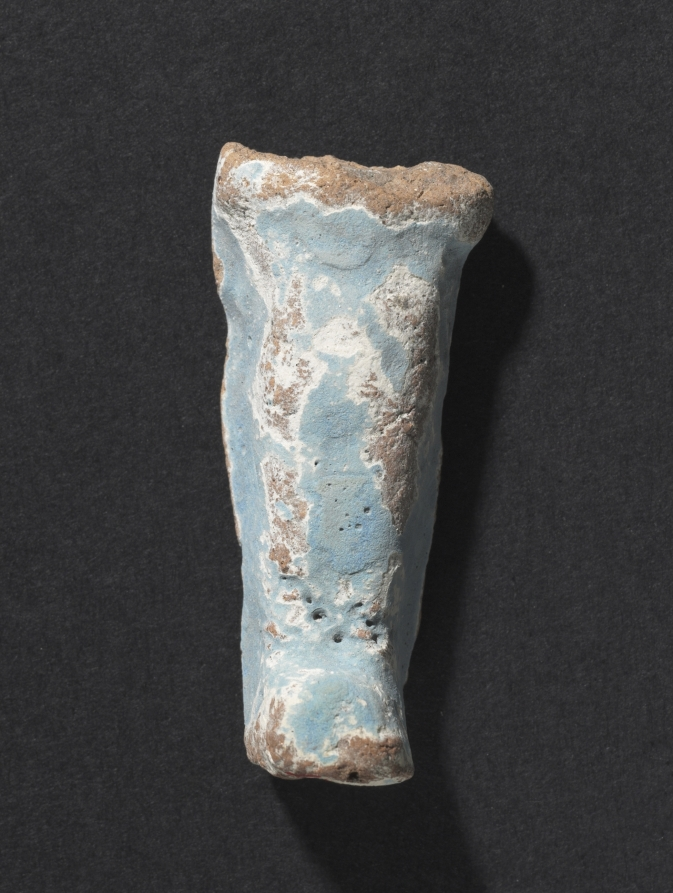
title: Shawabty of Ditamenpaankh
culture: Egypt, Late period (715–332 BCE), Dynasty 25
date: 715–656 BCE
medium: terracotta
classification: Funerary Equipment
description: High demand for shawabtys in the Late Period, a time when as many as 400 or more shawabtys were placed in the tomb with the deceased, gave rise to a specialized container for storing them: the shawabty box. This example is inscribed for the lady of the house, Ditamenpaankh, and was probably one of a pair originally made for her. The single-masted boat on the box's lid is perhaps an allusion to the pilgrimage of the deceased to the holy city of Abydos, the cult city of Osiris, king of the dead. The shawabtys inside are crude, mass-produced examples cast in an open mold. Made of terracotta, their blue paint imitates more costly shawabtys made of faience. As for the shawabty spell, it has been removed from its traditional location on the shawabty's front and relocated onto the sides of box, where it needed only to be written once, thus expediting production.